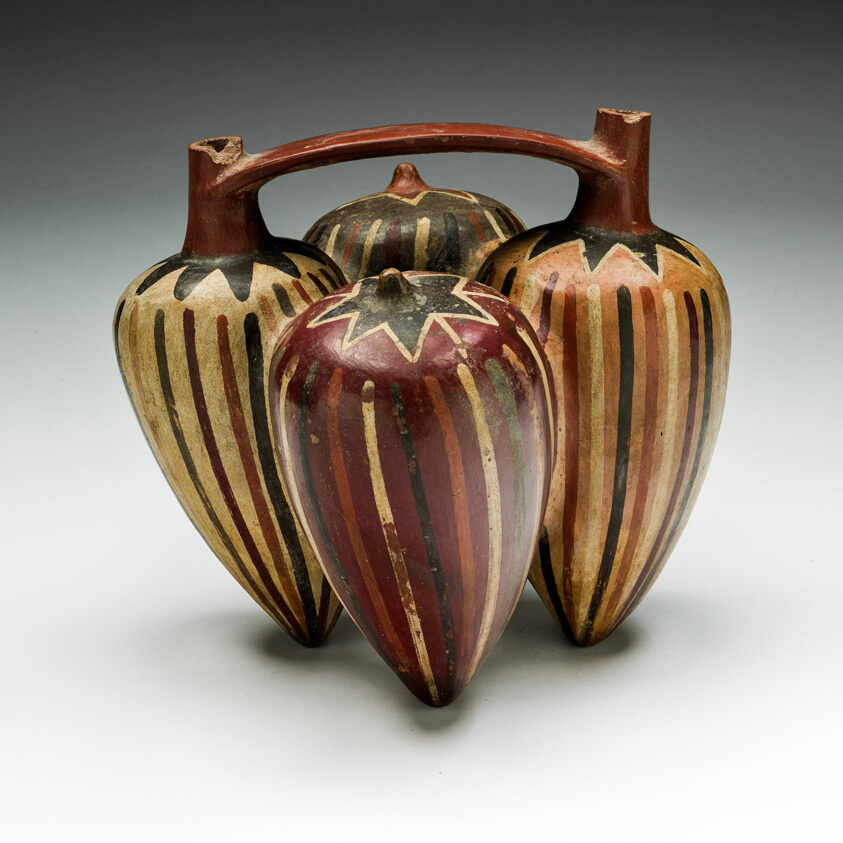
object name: Vessel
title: Vessel in the Form of Pepino Peppers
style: nazca, early intermediate period, Pre-Columbian, americas, andes, Arts of the Americas, andean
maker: Nazca; South coast, Peru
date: 180 BCE–500 CE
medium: Ceramic and pigment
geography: Peru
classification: earthenware; art of the americas; ceramics; vessel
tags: landscapes, agriculture, plant-derived motif